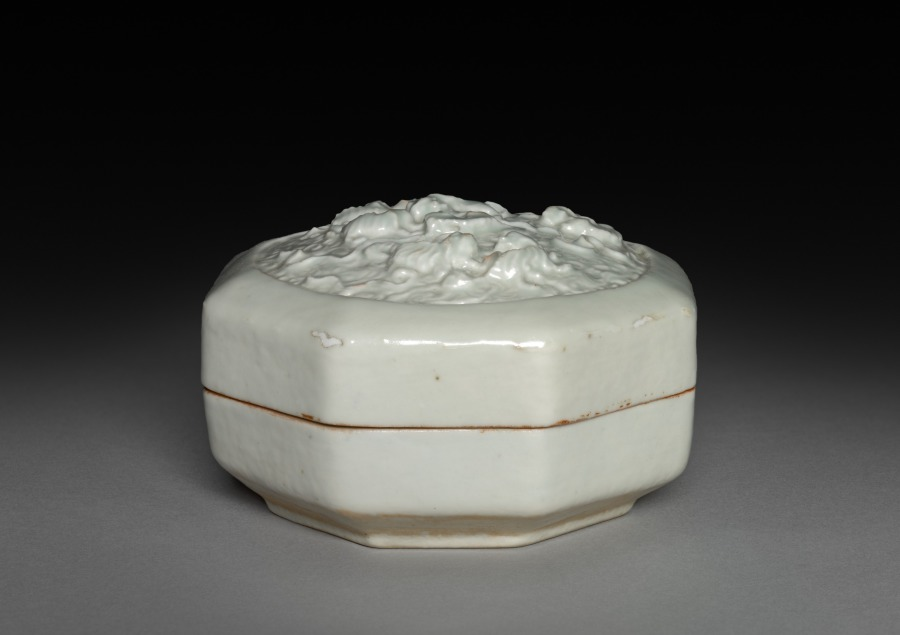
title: Hexagonal Covered Box with Lions in Relief: Qingbai Ware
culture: China, Jiangxi province, Jingdezhen kilns, Yuan dynasty (1271-1368)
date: 1300–1325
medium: glazed porcelain with molded and applied decoration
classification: Ceramic